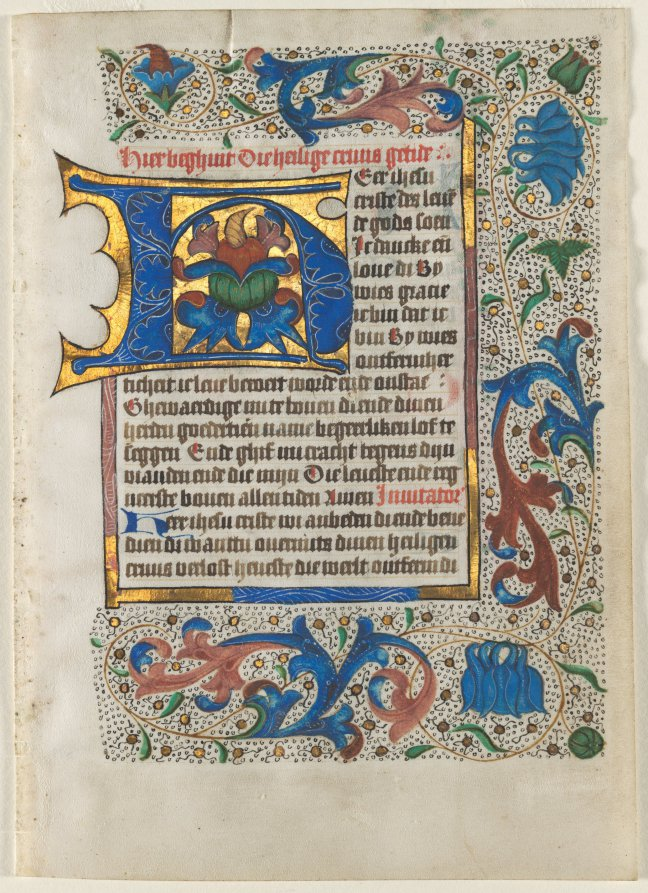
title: Leaf Excised from a Book of Hours: Decorated Initial H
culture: North Netherlands, Zwolle(?), 15th century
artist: related to Masters of the Zwolle Bible (Netherlandish)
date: c. 1470–1480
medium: ink, tempera, and gold on vellum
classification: Manuscript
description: The difficulty in localizing Dutch manuscripts of the second half of the 15th century is formidable. Many shared or exchanged characteristics are found, particularly in terms of page layout, border decoration, and initial design. The present leaf contains borders embellished with brightly colored flowers (columbines) and acanthus leaves filled in with gold bezants, tiny green leaves, and little black dots. Though different in palette, these elements bear closest resemblance to borders and initials produced by a group of artists associated with the Zwolle Bible (Utrecht, Universiteitsbibliotheek, MS. 31). The original illuminators are believed to have worked within the Monastery of the Canons Regular at Agnietenberg. This leaf is painted in an associated style by an artist who must have been familiar with the Zwolle group.